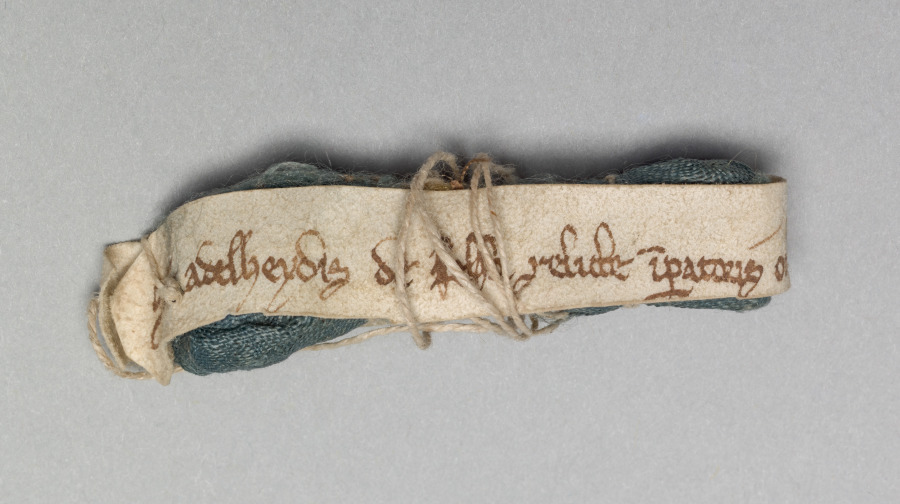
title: Relic of St. Adelaide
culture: Germany, Lower Saxony?, Romanesque period, 11th century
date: c. 1045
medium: bone, plain weave blue silk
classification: Metalwork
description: This relic is housed inside of the portable altar commissioned by Countess Gertrude of Brunswick, one of the Guelph Treasure’s earliest and most sumptuous objects.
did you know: This bone is thought to belong to a finger (metacarpal) although the curve is too prominent for a human. An exact determination can't be made without unwrapping it.